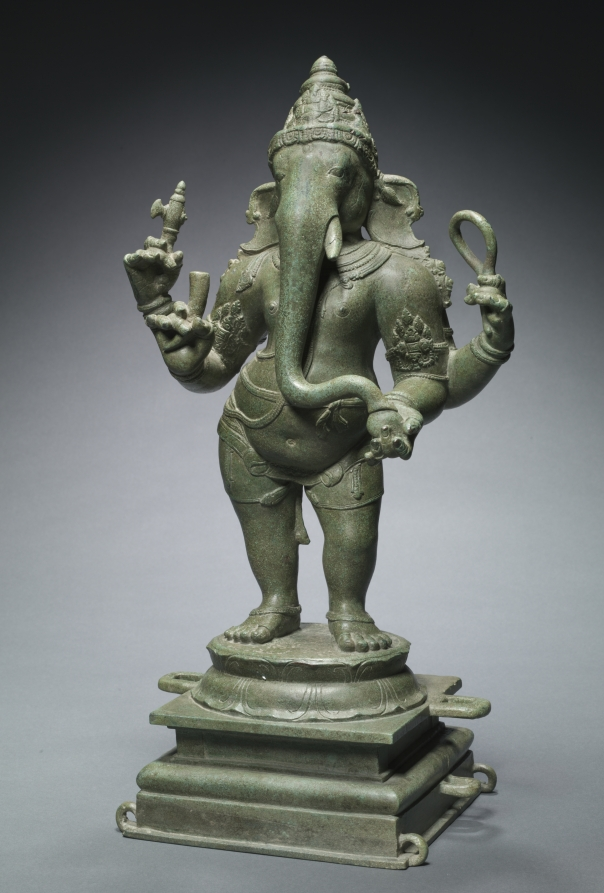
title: Ganesha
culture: South India, Medieval period, Chola dynasty(10th-13th century)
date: c. 1070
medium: bronze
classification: Sculpture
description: Ganesha, the god of wealth and abundance, is an auspicious and revered Hindu deity. He removes obstacles and protects his worshipers. Numerous myths explain how Ganesha became an elephant-man composite, but the most popular version relates the story of how he was decapitated by his enraged father, Shiva, and restored to life through the intervention of his mother, Parvati. Shiva agreed to revive him with the head of the first creature encountered: an elephant. Ganesha's strength—his profound spiritual wisdom—contrasts with his weakness for sweets, as indicated by his pudginess and the sweet modaka he carries. In Ganesha, opposing forces exist in perfect harmony.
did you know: Ganesha pulls his own broken tusk in one hand, which he used as a pen to write the epic Mahabharata.